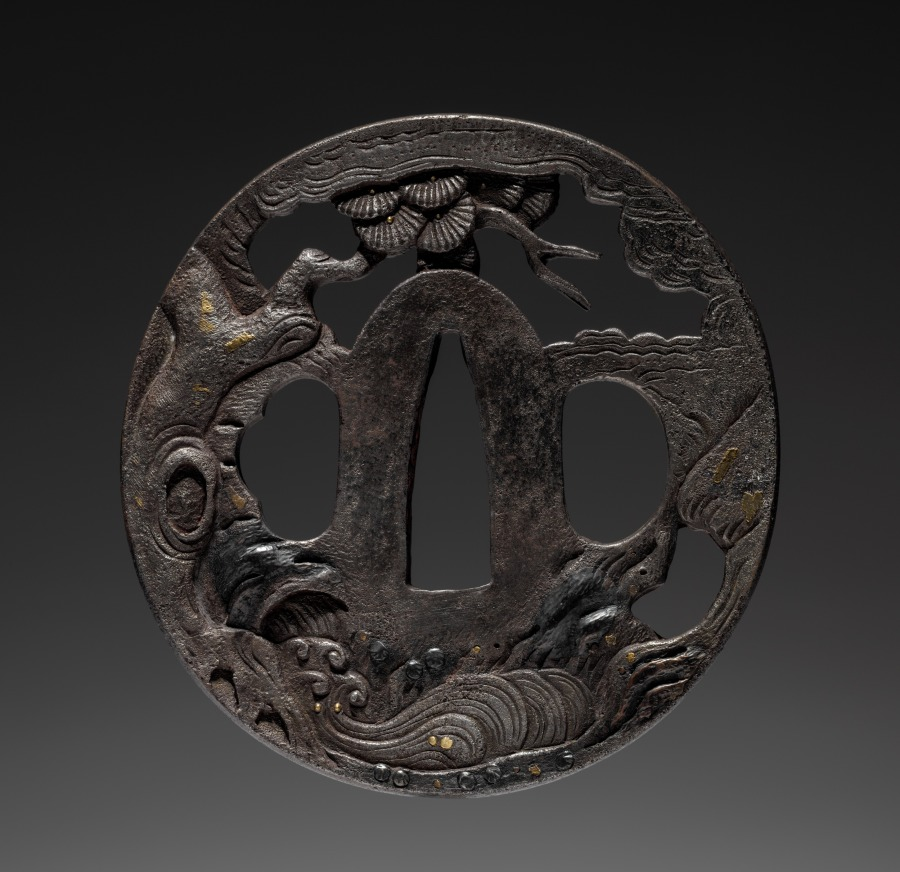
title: Sword Guard (Tsuba) with Chinese Immortal and Tiger Under Pine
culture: Japan, Edo period (1615–1868)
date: 1700s-1868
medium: iron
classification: Arms and Armor